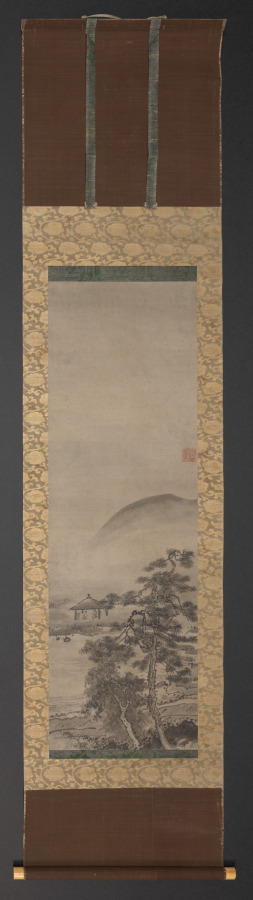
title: Landscapes with Figures (one of a pair)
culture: Japan, Muromachi period (1392–1573)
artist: Shūgetsu Tōkan (Japanese, 1440?-1529)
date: c. 1500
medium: hanging scroll; ink on paper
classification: Painting